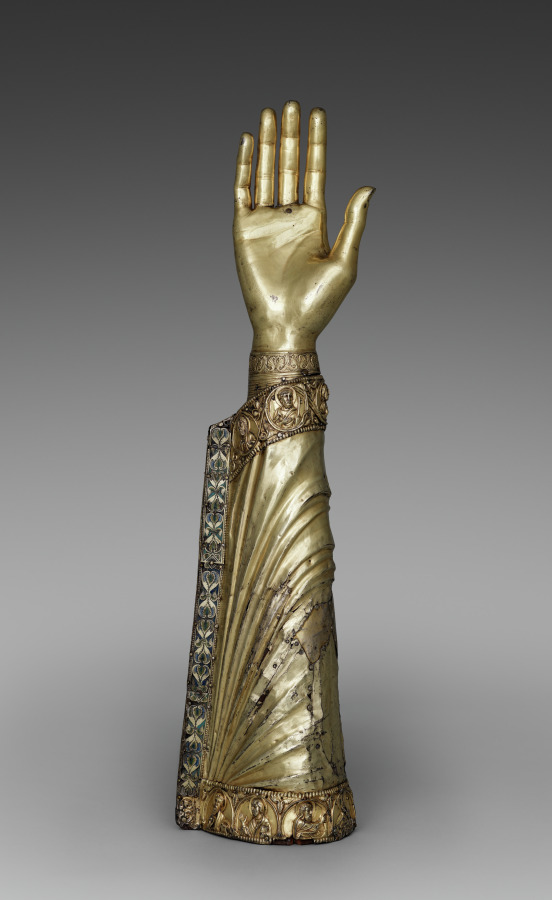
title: Arm Reliquary of the Apostles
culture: Germany, Lower Saxony, Hildesheim, Romanesque period, late 12th century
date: c. 1190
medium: gilt silver, champlevé enamel, oak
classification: Metalwork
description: Taking the form of a clothed lower arm with an outstretched hand, this reliquary from the Guelph Treasure appropriately enshrines a piece of an unidentified saint’s arm bone. Arm reliquaries like this one served as liturgical props; during religious services and processions, the clergy used them to bless and touch the faithful, thus making the presence of the saint more palpable and immediate. The apostle busts that decorate this arm reliquary seem to indicate that the relic it contains is that of an apostle. Duke Henry the Lion, a major patron of the church of Saint Blaise, is known to have received such relics from the Byzantine emperor Manuel I (1143-1180) upon his return from a pilgrimage to Jerusalem.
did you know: Reliquaries were prized not for the opulence that you see, but for the items that they held. They enshrined items associated with saints, like a piece of clothing they wore or a small portion of their remains. In this case, an arm bone is encased within.